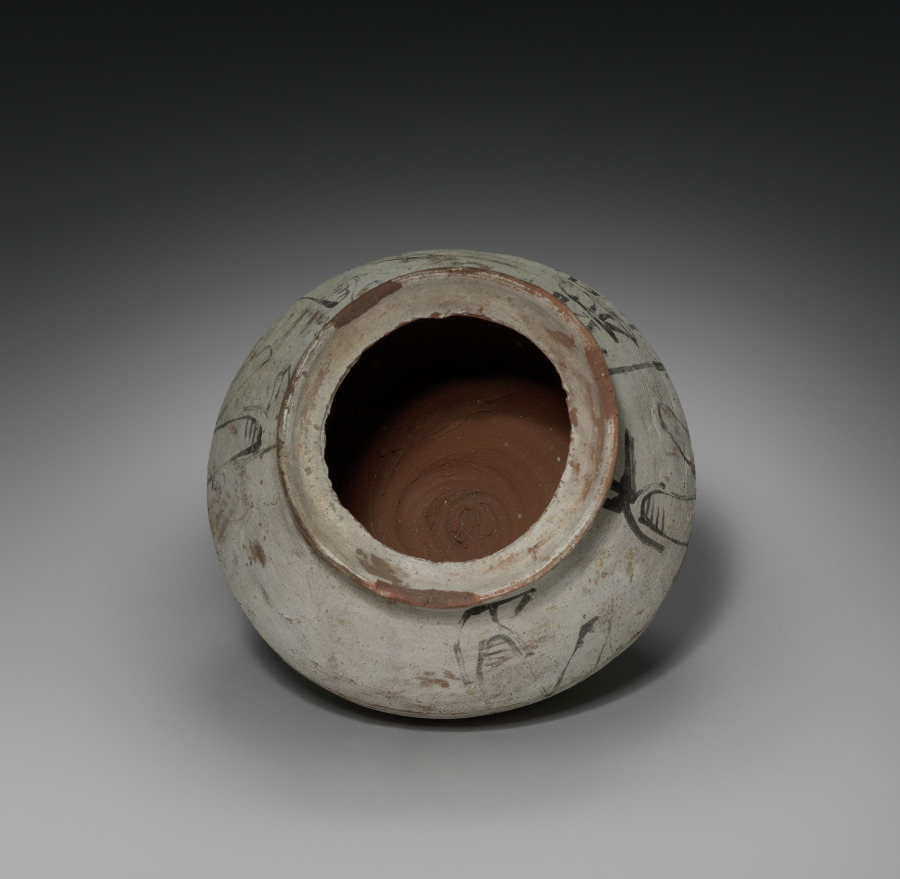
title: Shawabty Jar with Lid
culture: Egypt, New Kingdom (1540–1069 BCE), Dynasties 19–20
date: 1295–1069 BCE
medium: Nile silt ware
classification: Funerary Equipment